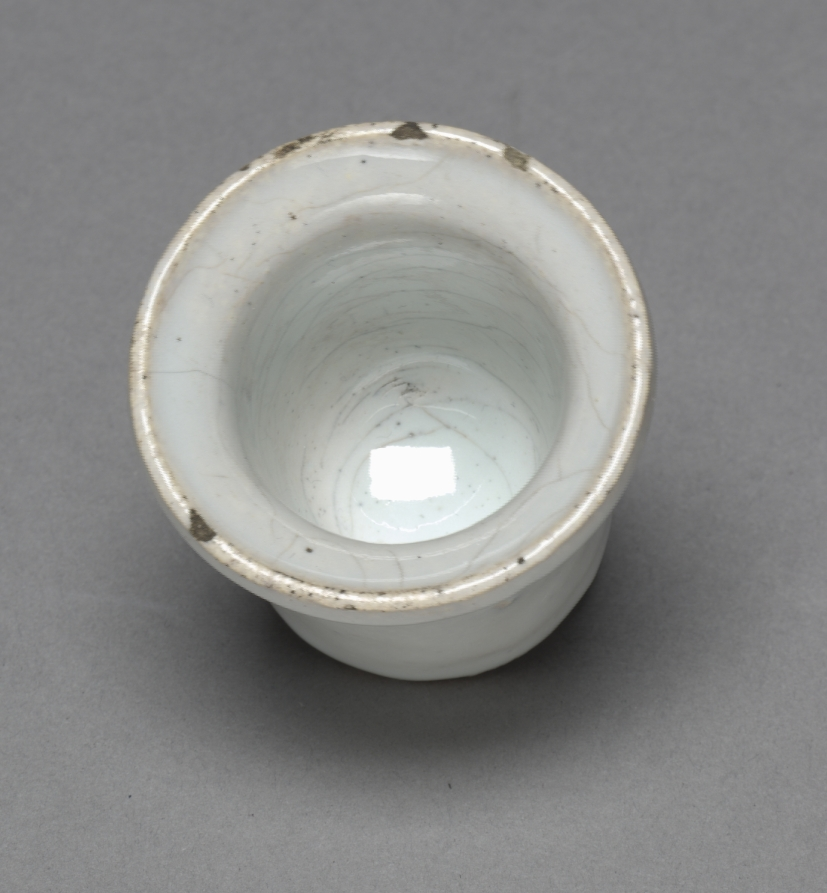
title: Writing Stand with Inkwells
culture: France, Sinceny, 18th century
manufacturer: Sinceny Factory (French)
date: 1746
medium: Tin-glazed earthenware (faience) with enamel decoration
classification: Ceramic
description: The faience factory at Sinceny was an offshoot of that at Rouen. In style, Sinceny closely resembles later Rouen wares with polychrome decoration. The stylized flowers and insects which decorate this writing stand are entirely typical of Sinceny faience.